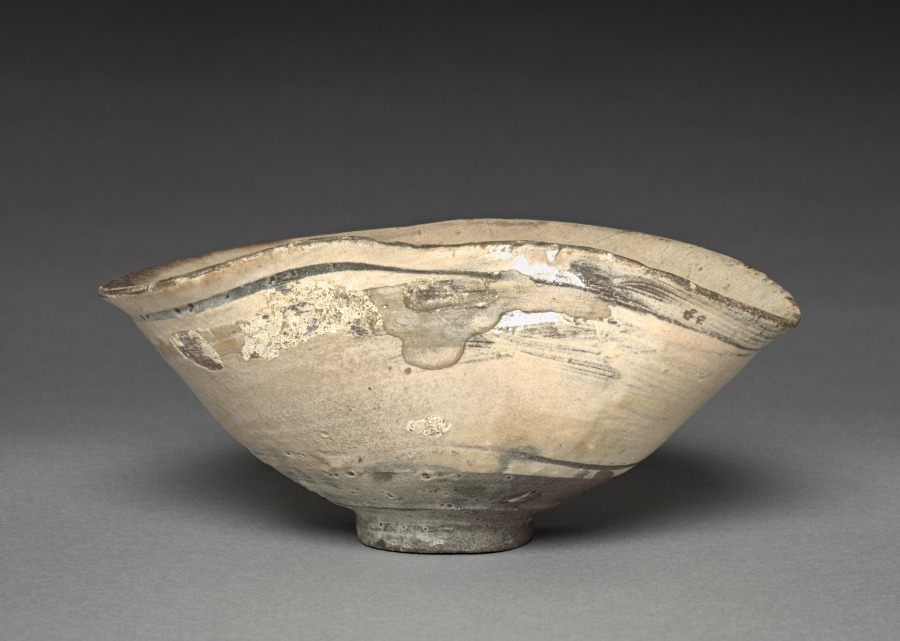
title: Bowl with Brushing Decorations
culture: Korea, Joseon dynasty (1392–1910)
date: 1400s–1500s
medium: Clay, glaze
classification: Ceramic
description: This type of wide-mouthed bowl was used everyday in Korea, not exclusively for tea drinking. But when it was introduced to Japan around the early 1500s, its imperfect appearance evoking the aesthetics of wabi-sabi caused it to be repurposed as a tea bowl. Korean tea bowls were circulated as an item of foreign luxury among Japanese military elites. Many Korean potters were abducted to Japan during the Japanese invasions (1592–98) and some settled down in provinces such as in the Saga prefecture in Kyushu. Dislocated Korean potters are often credited for their leading role in the development of ceramic industry in Japan.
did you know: This type of humble tea bowl was highly praised among Japanese collectors for its imperfect beauty.